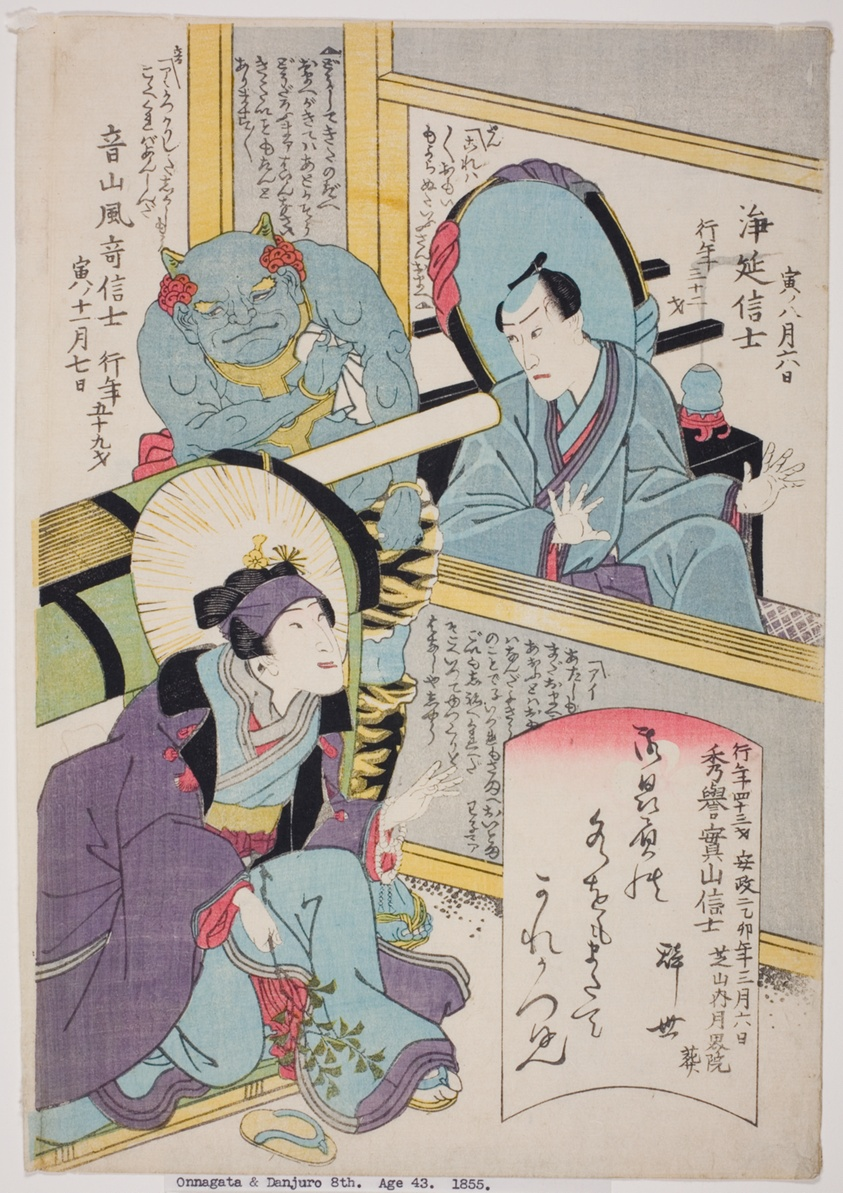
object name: Print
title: Memorial Portraits of the Actors Bando Shuka I, Arashi Otohachi III, and Ichikawa Danjuro VIII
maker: Utagawa School (Japanese, 19th century)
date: 1855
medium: Color woodblock print; oban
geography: Japan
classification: print; asian art